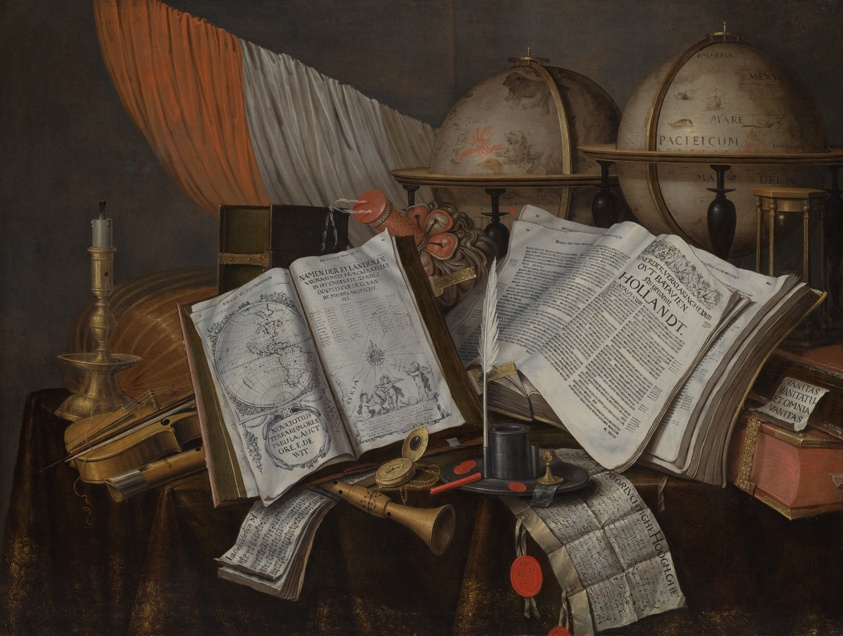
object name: Painting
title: A Vanitas Still Life with a Flag, Candlestick, Musical Instruments, Books, Writing Paraphernalia, Globes and Hourglass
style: 17th Century, Baroque, dutch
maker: Edwaert Collier (Dutch, 1642–1708)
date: 1662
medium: Oil on canvas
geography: Holland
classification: painting; european painting; paint; still life; oil on canvas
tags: still life, feathers, candleholder, flags, books, globes, maps